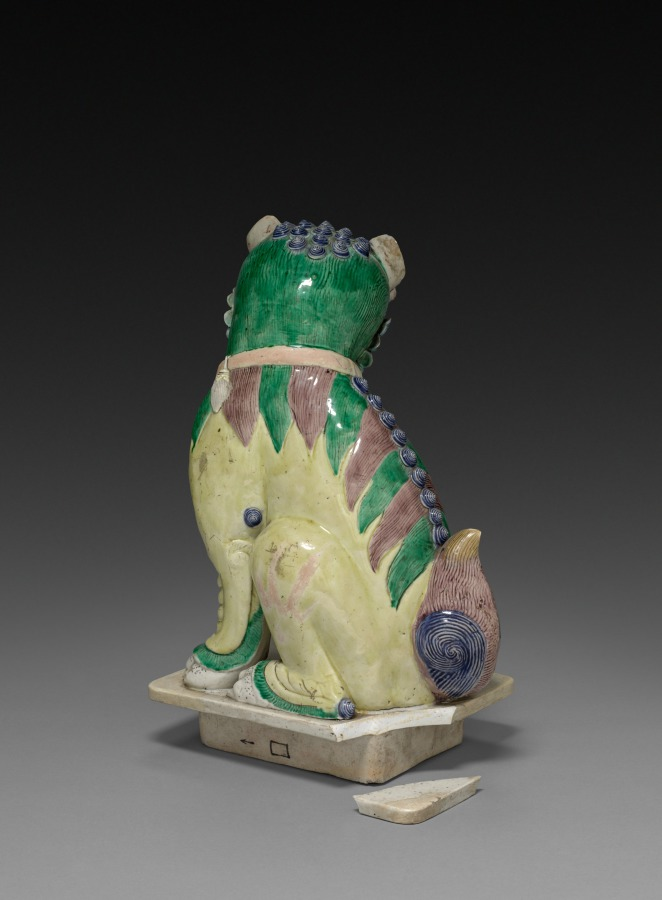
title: Lion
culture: China, Qing dynasty (1644-1911), Kangxi reign (1661-1722)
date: 1662–1722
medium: porcelain with overglaze enamel decoration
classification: Sculpture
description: This porcelain lion is a pair with 1930.642. This lion holding a ball is considered male, while the nurturing female is depicted with a cub. Guardian lions were traditionally placed in front of buildings to protect from harmful spiritual or human forces.